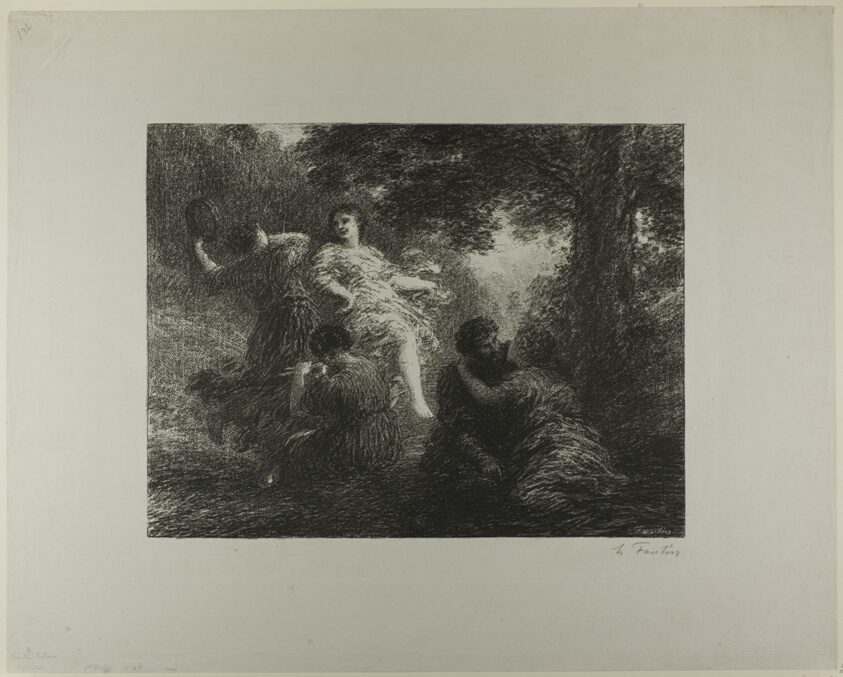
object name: Print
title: Pastoral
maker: Henri Fantin-Latour (French, 1836-1904)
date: 1896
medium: Lithograph in black on light gray chine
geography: France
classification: lithograph; print; prints and drawing